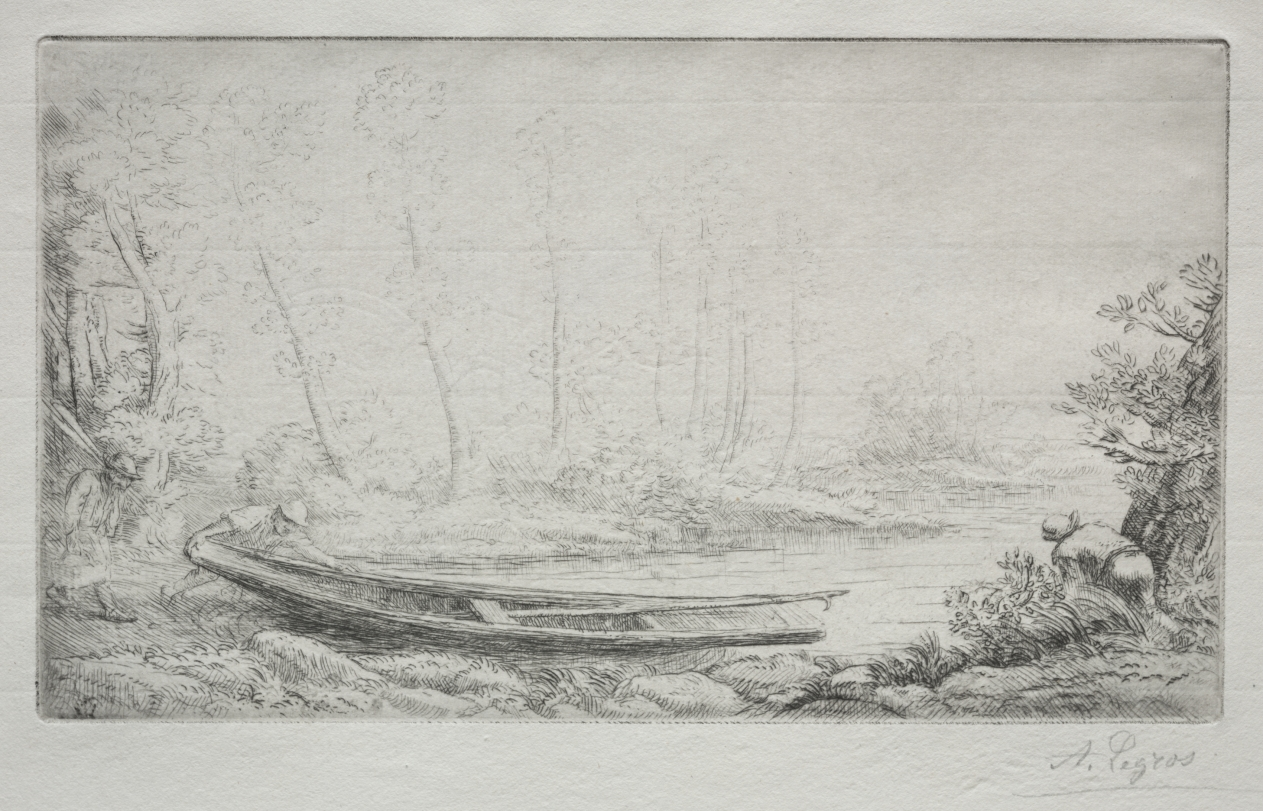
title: Le Départ pour le pêche, dans les brumes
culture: France, 19th century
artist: Alphonse Legros (French, 1837–1911)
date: c. 1890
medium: drypoint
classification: Print